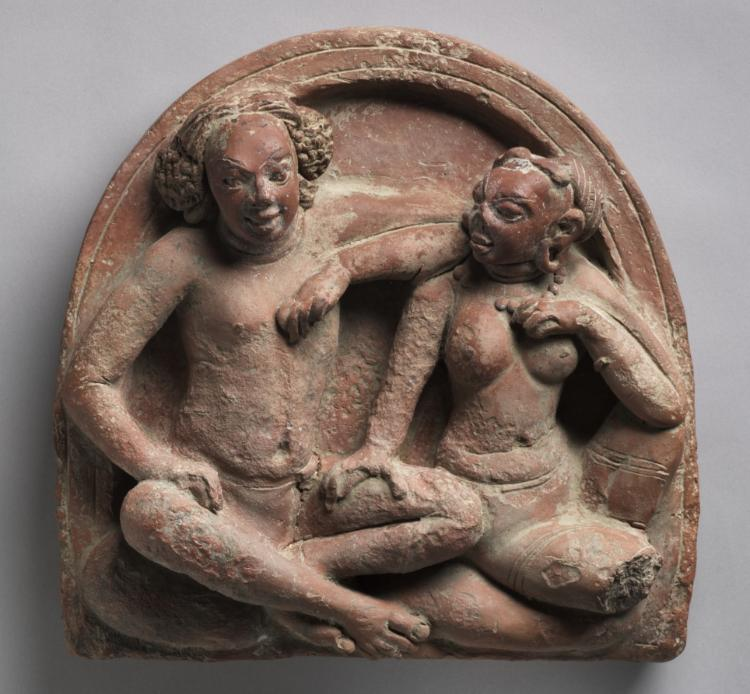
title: Amorous Couple (Mithuna)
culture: Northern India, Uttar Pradesh, Ahichchatra, Gupta period (c. 320-550)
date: 400s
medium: terracotta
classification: Sculpture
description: Amorous couples were among the most prevalent imagery on the exterior of sacred sites in early India. Their life-affirming imagery was considered auspicious. This roundel would have been part of a brick structure, since terracotta was typically used in the ornamentation of brick temples, instead of stone.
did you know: The site of Ahichchatra retains ruins of a pyramid-shaped brick temple dedicated to Shiva.